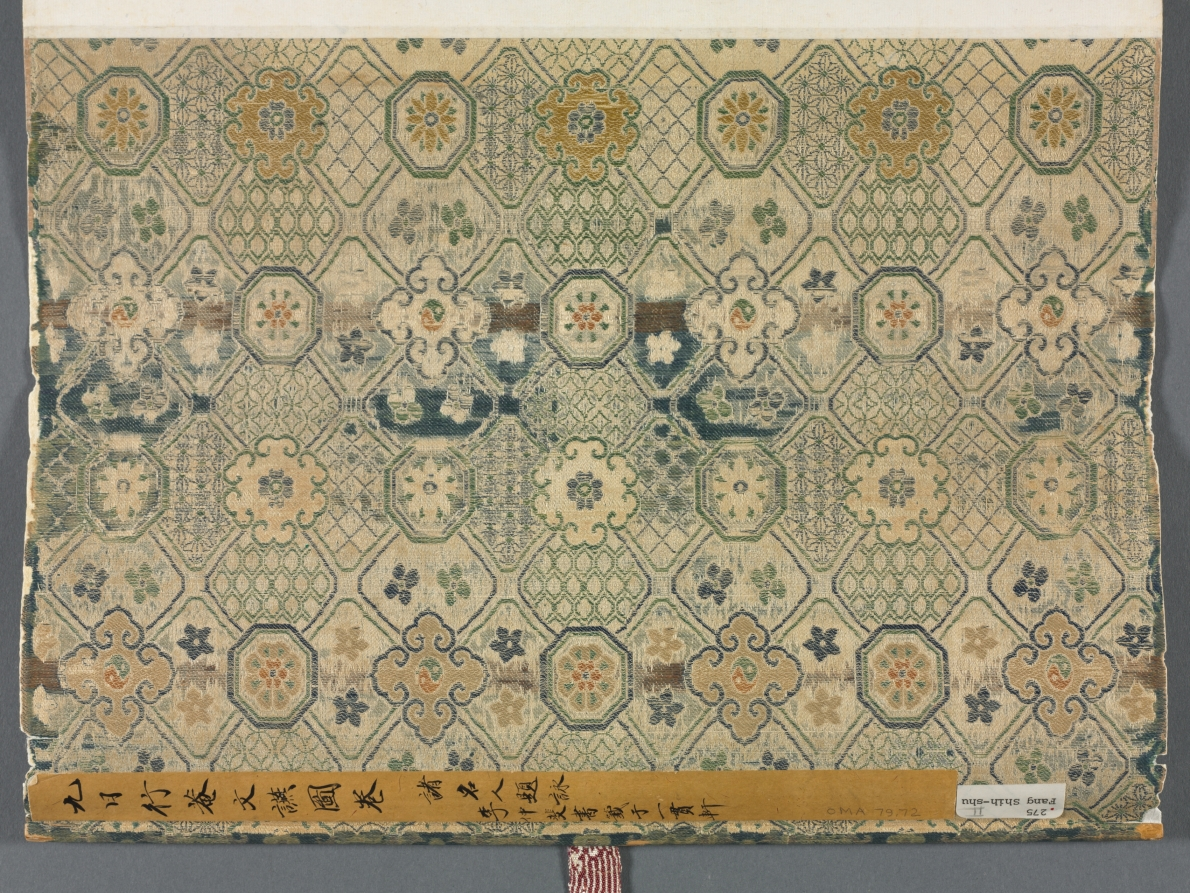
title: The Ninth Day Literary Gathering at Xing’an [Temporary Retreat]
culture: China, Qing dynasty (1644-1911)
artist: Fang Shishu (Chinese, 1693–1751)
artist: and Ye Fanglin (Chinese, active late 1600s–mid-1700s)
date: 1743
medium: Handscroll; ink and color on silk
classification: Painting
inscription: Fang Shishu's seal at beginning of painting: Ou ran shi de 偶然拾得. Ye Fanglin's seal at end of painting: Fanglin 芳林. Frontispiece title dated 1743 and 3 seals of Chen Bangyan 陳邦彦 (1678-1752).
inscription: 行庵在揚州北郭天寧寺西隅，馬君嶰谷半槎兄弟購僧房隙地所築，以為游息之處也。寺為晉謝太傅別墅。西隅饒古木，䨴鬱陰森，入林最僻，不知其近郛郭。庵居其中，無斲礱髤采之飾，惟軒庭多得清蔭，來憩者每流連而不能去。乾隆癸亥九日，積雨既收，風日清美，遂約同人，咸集於斯，中縣［懸］仇英白描陶靖節像，采黃花，酌白醪為供，乃以人世難逢開口笑，菊花雖插滿頭歸分韻賦詩。陶陶衎衎，觴詠竟日。既逾月，吳中寫真葉君敬［震］初適來，群貌小像，合為一卷，方君環山補景，命曰九日行庵文讌圖。裝池成，將各書所作於後，而囑鶚為之記。記按圖中共坐短榻者二人：右箕踞者，為武陵胡復齋先生期恆；左抱膝者，為天門唐南軒先生建中也。坐繩床者二人：中手牋者，歙方環山士庶；左仰首如欲語者，江都閔玉井華也。一人坐藤塾捻髭者，鄞全謝山祖望也。一人倚石坐若凝思者，臨潼張漁川四科也。樹下二人：離立把菊者，錢唐厲樊榭鶚；袖手者，錢唐陳竹町章也。一人憑石床坐撫琴者，江都程香溪先生夢星也。聽者三人：一人垂袖立者，祁門馬半查曰璐；二人坐瓷塾，左倚樹、右跂腳者，歙方西疇士疌 、汪恬齋玉樞也。二人對坐展卷者，左祁門馬嶰谷曰琯，右吳江王梅沂藻也。一人觀者，負手立於右，江都陸南圻鐘輝也。從後相倚觀者一人，歙洪曲溪振珂也。童子種菊者三人：樹間侍立者一人，撰杖、執卷者各一人。其植有蕉、有竹，又有雜樹，作丹黃青碧之色，紀時也。夫重九佳名，舉俗所重，而高常侍歎獨坐而搔首，陸天隨感登高以剫門，無其時地與人耳。今吾儕幸生太平，遇勝地，又皆素心有文之侶，固人世不可多得之會；而此十六人者，或土斷，或客游，聚散不常。異日者，歲月遷流，撫節物以有懷，一披此圖，悅如晤對。將來覽者，或亦不異此意乎。甲子夏五十有四日厲鴞記並書。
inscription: 揚州為江北大都會，居民連甍接楹，笙歌輿從，竟日喧聚，其於淸歌雅集，葢罕矣。城北天寧寺，為晉謝公駐節時所游息，其中有行庵，吾友馬君嶰谷、半查兄弟之小築也。地不踰五畝，而老樹古藤，森蔚相望，皆千百年物，間以修竹，春鳥秋蟲，更唱迭和，其間曲廊高榭，位置閑適。出門未數百步，即黃塵濁流極目，令人作惡。而此中獨蕭然有人外之思。乾隆八年九日，嶰谷兄弟招集同社一十四人祀陶公，出所藏仇實父白描像懸於閣上，各賦一詩。予方留滯西泠，未得預也。又踰旬而予至，諸君方擬繪圖記事，嶰谷曰：是不可無君。乃以展日更舉，令予得陪卷軸之末；而洪君曲溪，兩度皆以病失約，然故吟社中人也，亦補入焉。予太息謂諸君曰：謝公之風流，千古如在；然其游息於斯也，則與東山賓從之樂稍不同矣。公之為是行也，蓋以符氏之亂，思北定中原也。而其時公巳困於讒口，不自安於朝；雖在河朔極有可乘之會，而神明內索，徘徊不克自前。老師左次，竟無尺寸之功，坐失事幾。吾常過邵伯之埭，吊法雲之荒祠，未嘗不喟然累啼，以為明德之衰也。至若九日嘉名，陶公高格，固在羲皇懷葛之間；然而讀其 止酒之詩，蒼梧漢水之感，以瘦詞寄其孤憤則夫黃花白酒，蓋亦不得巳而漫與焉者。今吾輩生逢太平之日，書淫墨癖，是處留連，胸次中了無一事，為江湖之幸民，論人雖甚媿，論其時與地，則不可不私相慶也。諸君曰：善。圖之詳巳見於厲君樊榭記中。予之許為嶰谷兄弟序斯圖也，三年於茲；今夏重披圖捉筆，而唐丈南軒，巳化為異物矣。對酒當歌，人生幾何，願與諸君並日相遇從焉。丙寅夏杪孤山社小泉翁全祖望序。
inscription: 6 additional colophons and 15 additional seals: 1 colophon, dated 1746, and 1 seal of Huang Zhijun 黃之雋 (1668-after 1746); 1 colophon and 2 seals of Zha Xiang 查祥 (1718 jinshi); 1 colophon, dated 1746, and 3 seals of Zhang Siwen 張思問; 1 colophon, dated 1748, and 4 seals of Shao Dong 卲東 (1721 jinshi); 1 colophon, dated 1753, and 2 seals of Fang Shiju 方世舉 (signing as Fang Funan 方扶南); 1 colophon, dated 1808, of Ruan Yuan 阮元 (1764–1849); 3 seals unidentified.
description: By the 1700s, Yangzhou was flourishing both economically and culturally as the most prosperous city in China, having surpassed all other Jiangnan cities in their creation of gardens. This group portrait commemorates a literary gathering in the private garden of the salt merchants and art patrons Ma Yueguan (1688–1755) and his brother Ma Yuelu (1697–after 1766) in Yangzhou. Ma Yueguan received imperial recognition for providing financial aid and food relief for those affected by flood and drought. Ma Yueguan is seen seated at the end of the painting holding an open scroll while Ma Yuelu stands behind the qin instrument player. Among the guests were officials, scholars, poets, painters, and merchants, a mix of local members of a poetry club reflecting increasing social diversity.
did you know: The two hosts and their fourteen guests were all officials, scholars, poets, painters, and salt merchants.